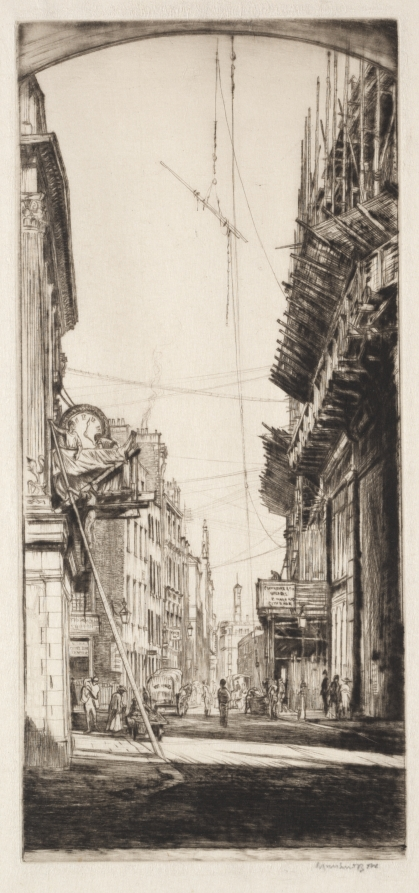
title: Liberty's Clock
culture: England, 20th century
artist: Muirhead Bone (British, 1876–1953)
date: 1909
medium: drypoint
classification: Print